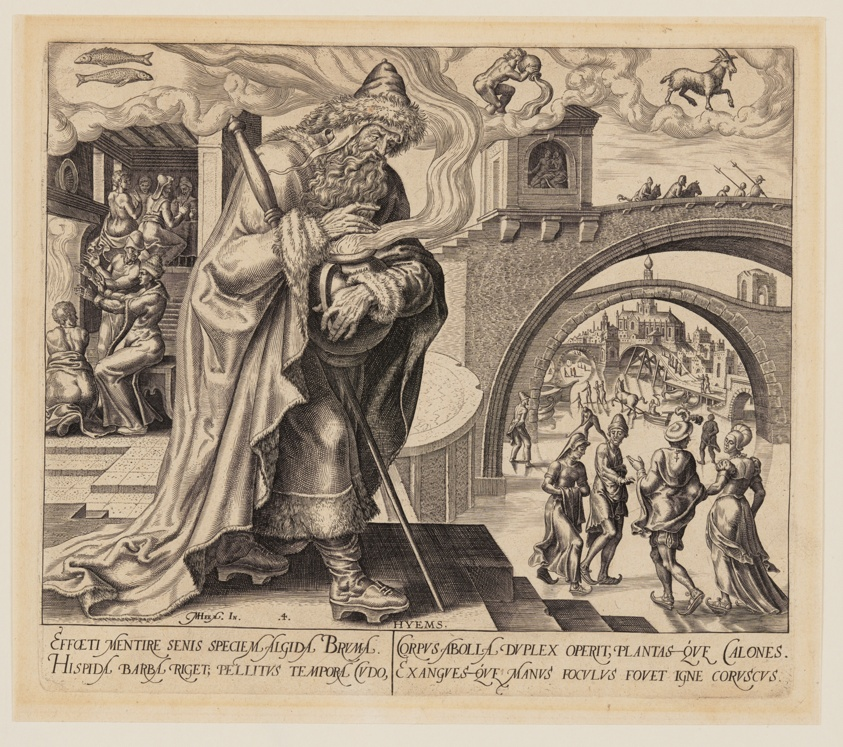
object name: Print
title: Winter, from The Four Seasons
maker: Philips Galle (Flemish, 1537-1612); after Maerten van Heemskerck (Dutch, 1498–1574)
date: 1563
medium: Engraving on ivory laid paper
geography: Flanders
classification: engraving; paper; print; prints and drawing